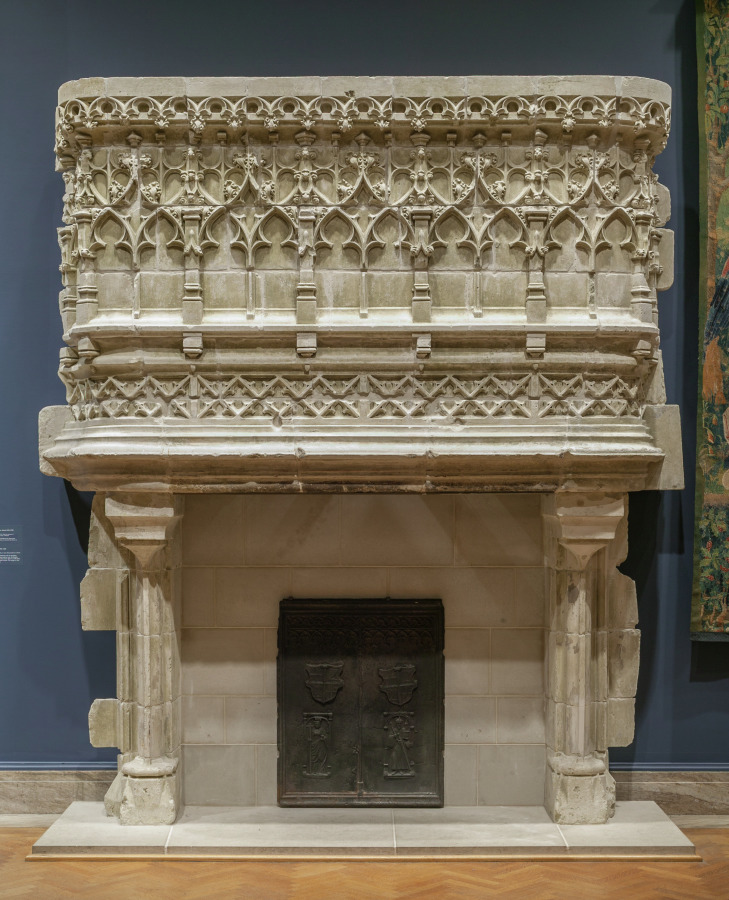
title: Chimney Piece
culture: France, Champagne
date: c. 1480–1520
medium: limestone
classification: Sculpture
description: This chimney piece is believed to have once been part of the château at Amand-les-Eaux in northern France.